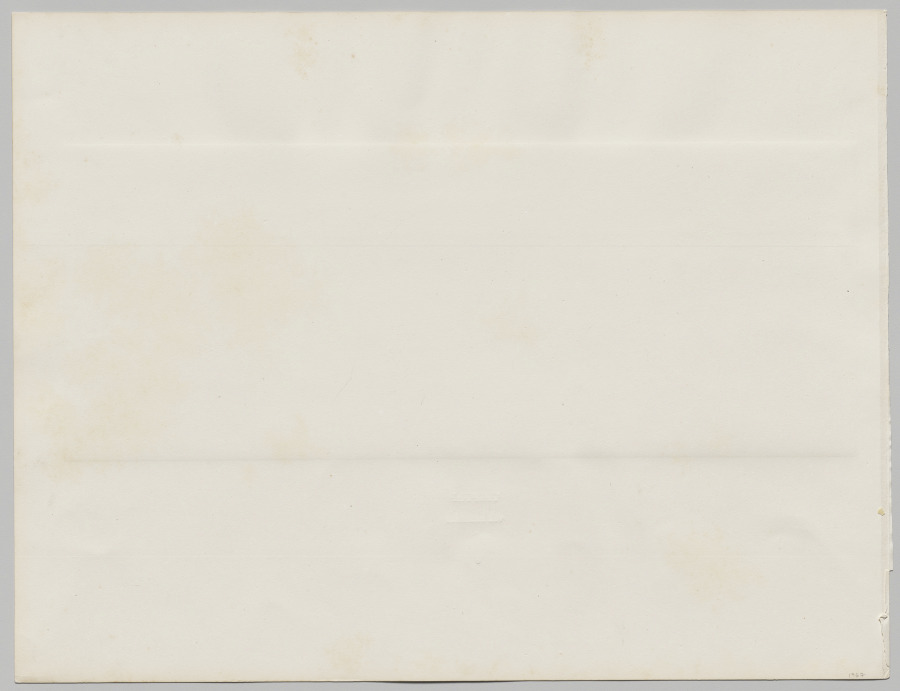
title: Tripoli, Vue Partielle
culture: France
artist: Louis de Clercq (French, 1836–1901)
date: 1859–60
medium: albumen panoramic print from two waxed paper negatives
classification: Photograph